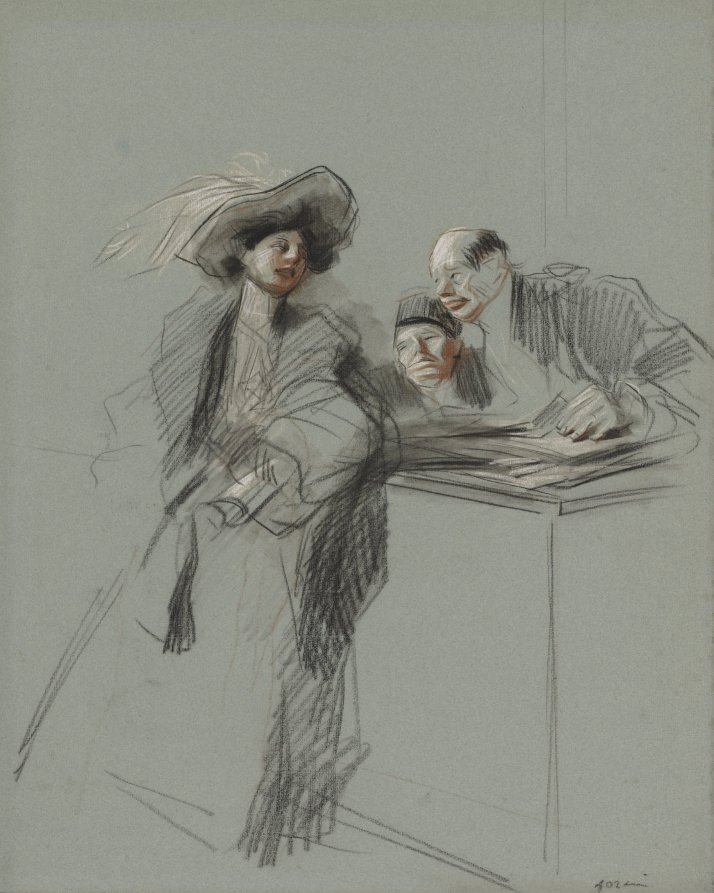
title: The Client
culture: France, late 19th-early 20th Century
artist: Jean Louis Forain (French, 1852–1931)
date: fourth quarter 1800s or first third 1900s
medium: black, brown, and white chalk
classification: Drawing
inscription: signed, lower right, in black chalk: forain